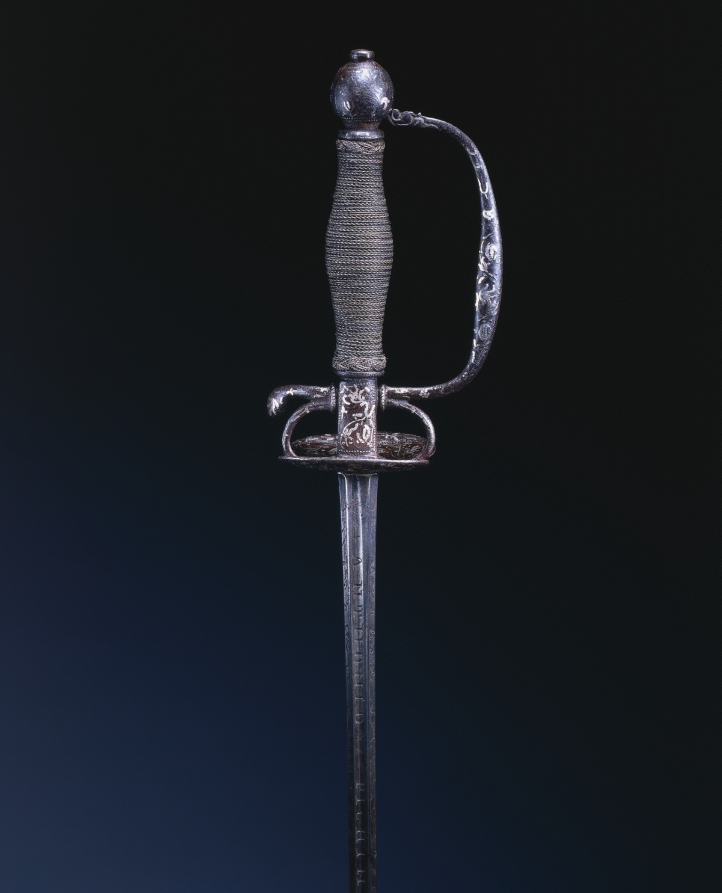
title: Small Sword for a Boy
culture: Italy, 17th century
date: c. 1650–1680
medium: steel, wood; hilt with inlaid floral designs in silver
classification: Arms and Armor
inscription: ANTHONIO PICHINIO